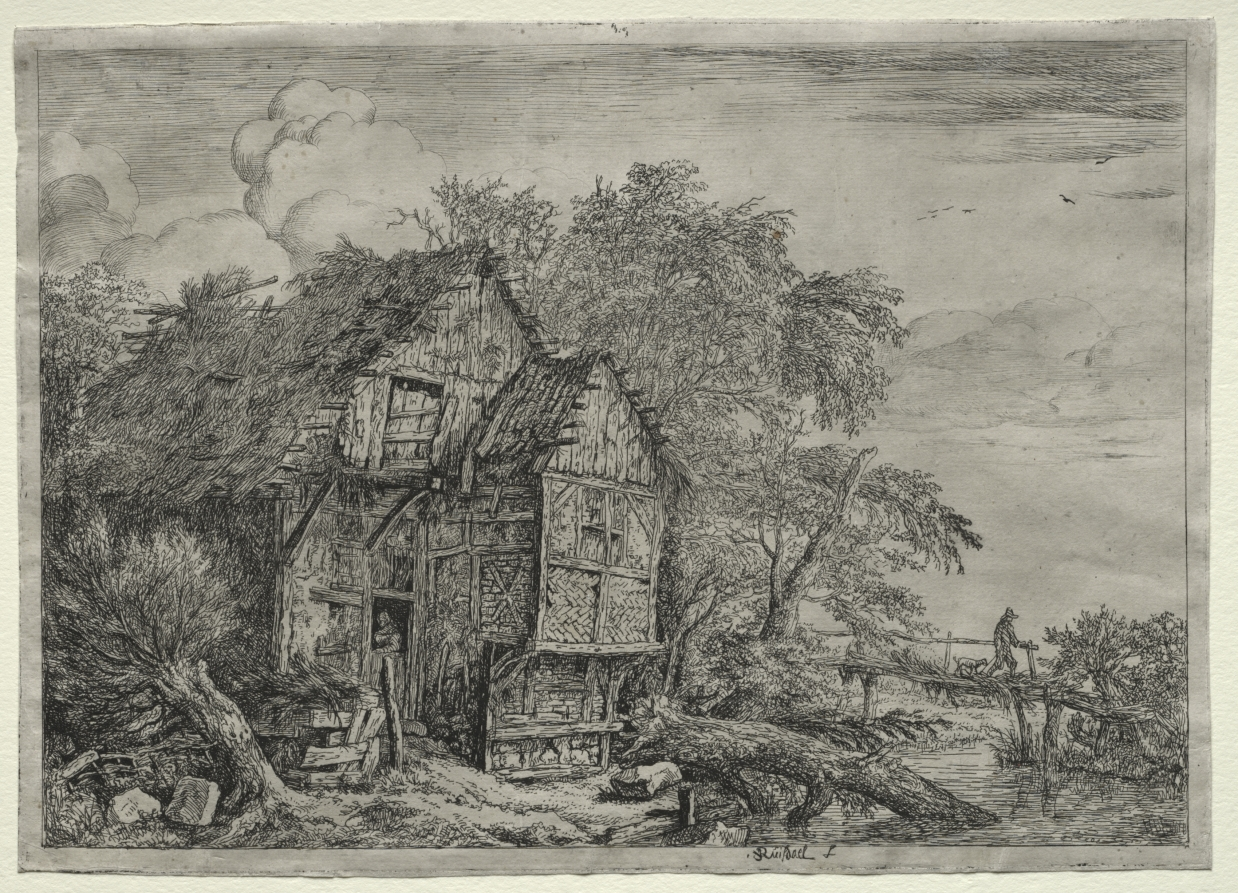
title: The Little Bridge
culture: Netherlands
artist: Jacob van Ruisdael (Dutch, 1628/29–1682)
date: c. 1650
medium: etching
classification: Print